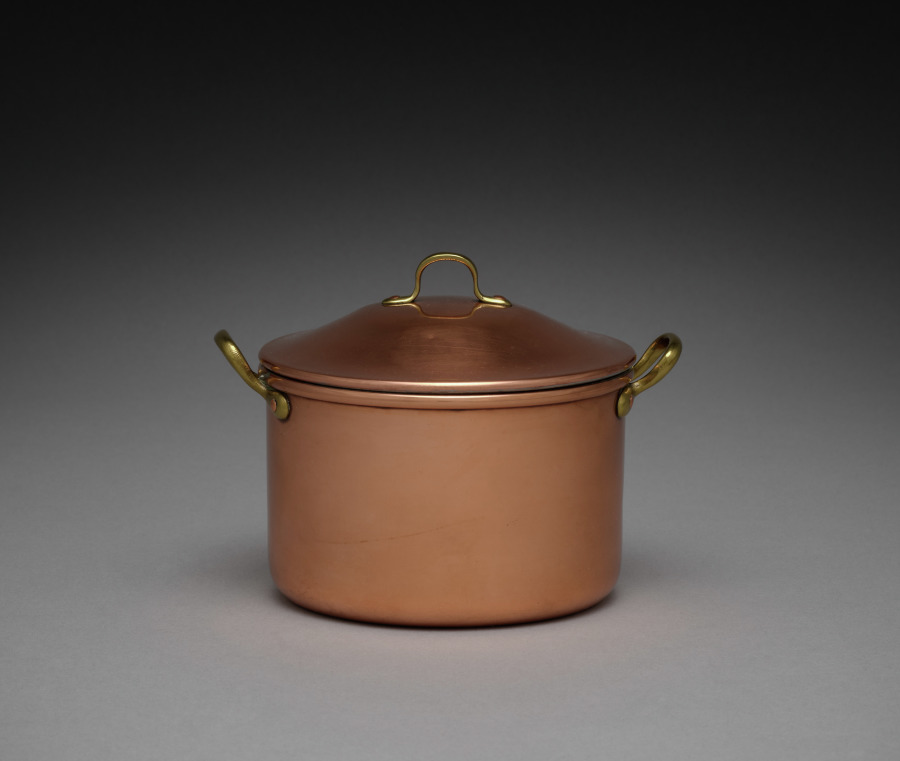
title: Covered Pot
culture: Russia, St. Petersburg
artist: firm of Peter Carl Fabergé (Russian, 1846–1920)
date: 1914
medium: copper with brass handles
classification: Metalwork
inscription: Inscribed: Double-headed eagle; C.FABERGE (in Cyrillic); War (in Cyrillic), 1914r.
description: As Russia entered the First World War, austerity and economy settled into the fabric of life even among wealthy aristocrats and nobility. Not only were precious materials such as gold, silver, and gemstones hard to procure, but such luxury seemed out of place when so many men were dying at the front. Fabergé contributed to the war effort by making shells, casings, and other munitions out of brass and copper. He also made cookware, such as this small soup pot, to be sent to the front lines with provisions tucked inside. However, these simple forms only looked affordable. They were still a luxury only the wealthiest families could afford to send to their sons.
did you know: This copper soup pot was sent to the front lines filled with provisions during the First World War.